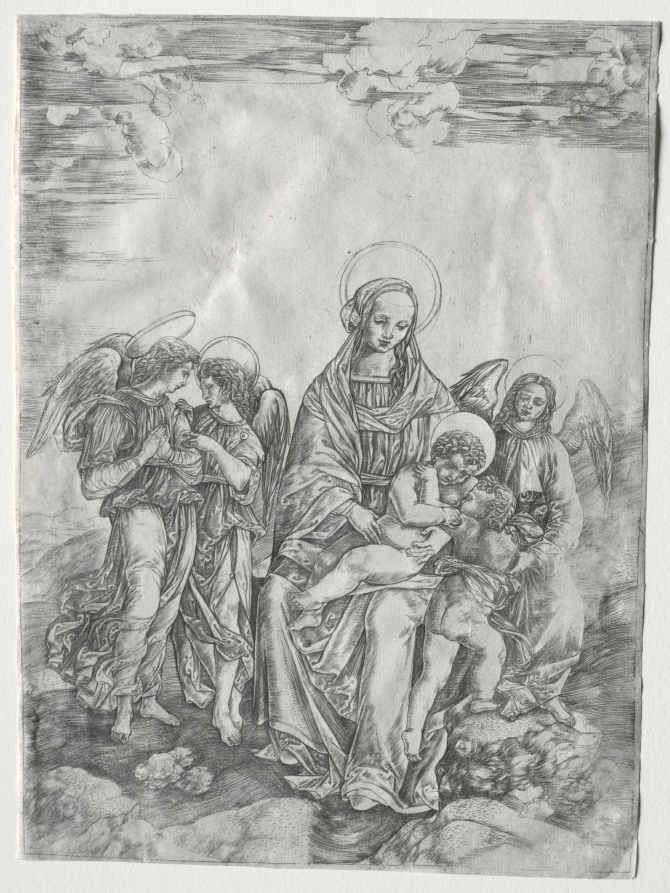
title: Virgin and Child with the Infant Saint John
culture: Italy, 16th century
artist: Cristofano Robetta (Italian, 1462–1534)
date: 1500–1520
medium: engraving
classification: Print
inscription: Written in pencil on verso: "C9603"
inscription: Written in pencil on verso: "B13 (?)"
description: Active in the early 1500s, the Florentine engraver Cristofano Robetta relied on paintings, frescoes, and works on paper by both Italian and northern European artists, borrowing motifs, figures, and settings with varying degrees of faithfulness. Paintings and drawings by the Florentine artist, Filippino Lippi, were a primary source of inspiration. In this engraving, the central figures of the Virgin, Child, and Saint John derive from Filippino’s Holy Family tondo, though the printmaker replaced the Saints Margaret and Joseph with angels.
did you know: Trained as a goldsmith, Robetta’s engraving style consists of extremely fine lines combined with crosshatching and dots.